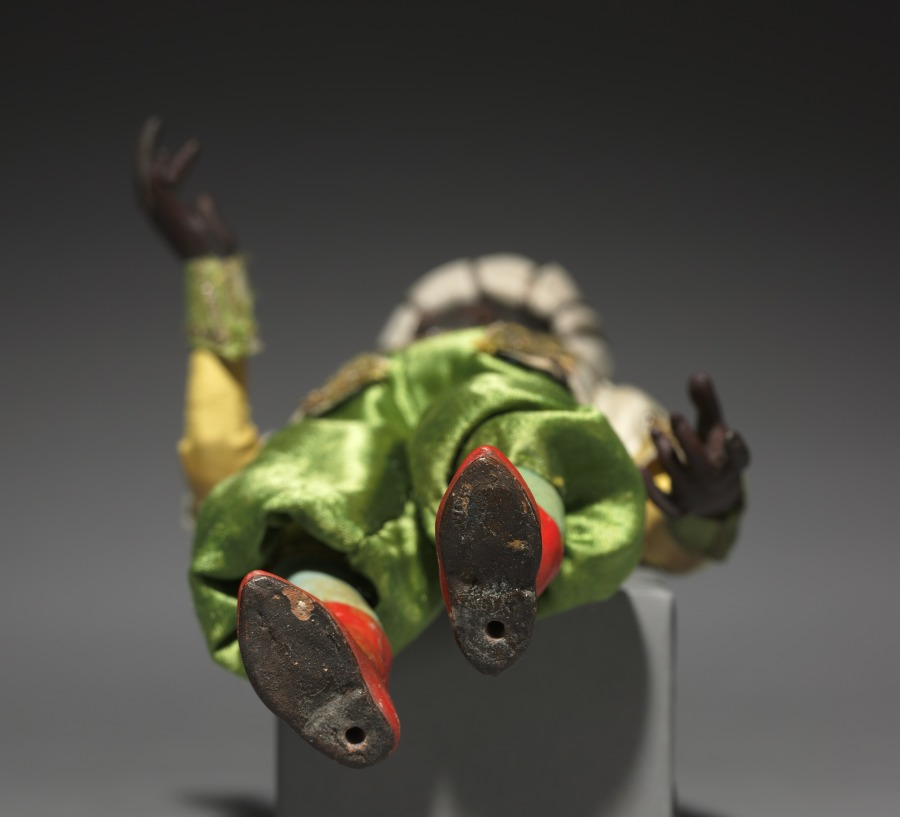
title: Figure from a Crèche: Attendant of the Magi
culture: Italy, Naples, late 18th-early 19th century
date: 1780–1830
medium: painted wood and terracotta with various textiles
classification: Sculpture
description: The practice of creating scenes of the Nativity for the home dates from the early 1700s in Italy, where people began to set up doll-like figures of about a foot or less in height. The custom was particularly popular in Naples around 1800, where crèche scenes (crèche means cradle, or crib) included many figures, whose heads and hands of painted terracotta, stuffed cloth bodies, and clothing adapted from contemporary local costumes gave them an amazingly realistic character. Representations of the birth of Jesus can be traced to the first few centuries of Christianity. Both living creatures and sculptural depictions of them were used from early times. By the late middle ages it was customary to create life-size figures of wood or stone, naturalistically painted, to represent the characters who participated in the events of Jesus's early life. These sculptures were then arranged in scenes illustrating one or both of the most important of these events, the Adoration of the Shepherds and the Adoration of the Magi-the three kings from the East who came to pay homage to the Christ child. Used in churches, these large figures were especially popular in Italy, Central Europe, Spain, and Portugal.